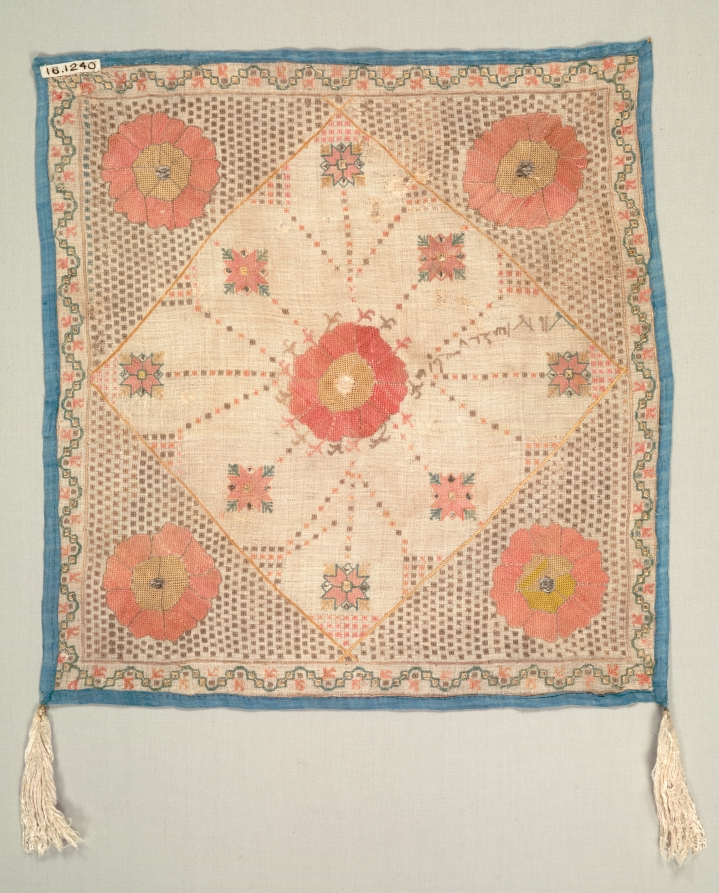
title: Embroidered Square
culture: Turkey, 19th century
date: 19th century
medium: embroidery: silk and metallic threads on linen tabby ground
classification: Embroidery